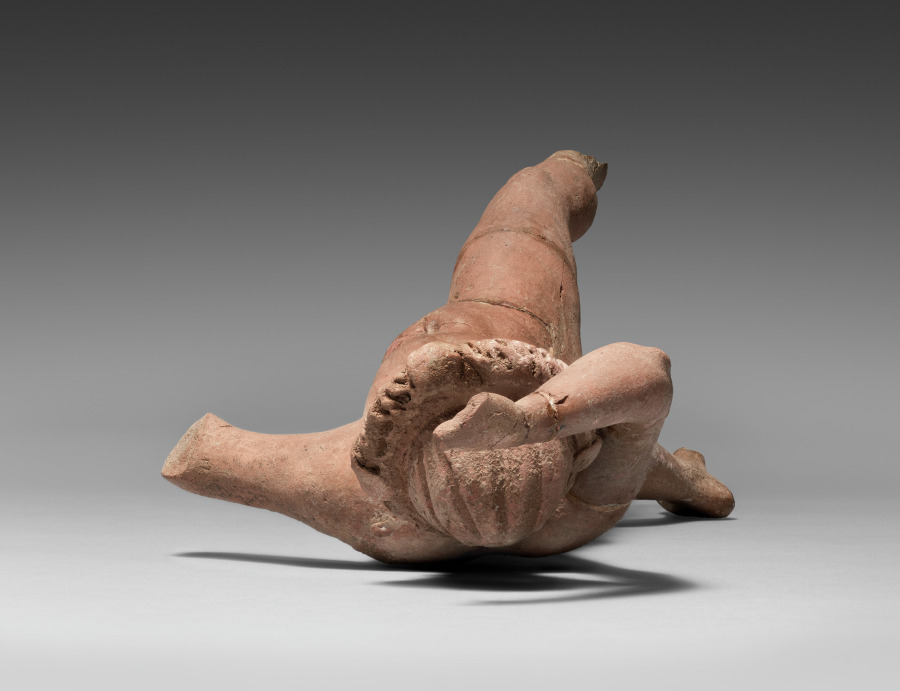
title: Dancing Eros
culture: Anatolia, Myrina, Greece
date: 300–200 BCE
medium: terracotta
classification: Sculpture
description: The region of Myrina in Asia Minor (now part of modern Turkey) is known for its abundance of ancient terracotta figurines. Eros, the Greek god of love, was especially popular. Here he is depicted as a nude youth, not a small child. Eros’ extra-long legs and arms, though only partially preserved, are thrown about in a carefree dance. He wears a celebratory floral crown atop his long curls. Once probably fully painted, only traces of red pigment survive on the face. A figurine like this one may have been a votive or offering of thanks to Eros or Aphrodite, his mother, also a goddess of love, for a successful marriage.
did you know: Figurines of Eros are often paired with figurines of his mythological wife, Psyche.